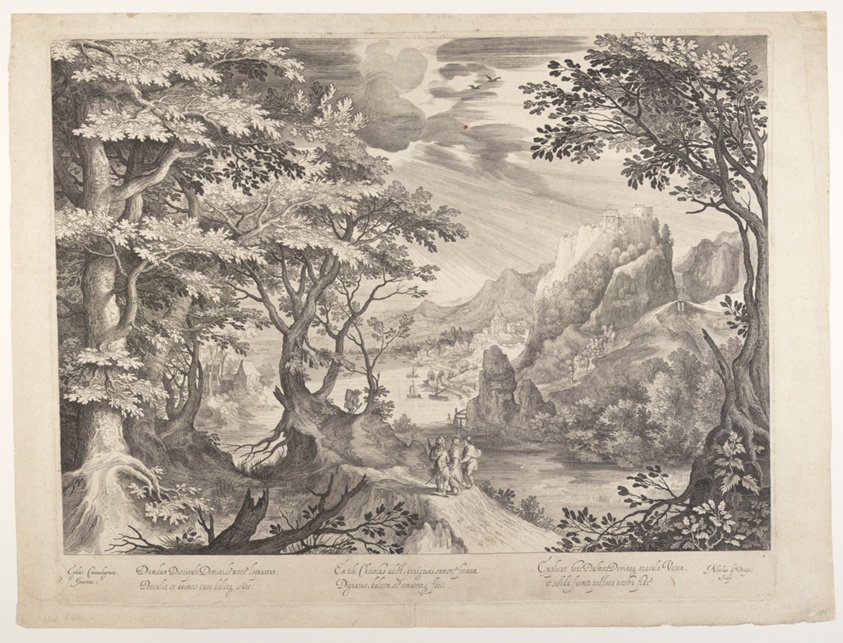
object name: Print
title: The Disciples on the Way to Emmaus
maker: Nicolaes de Bruyn (Flemish, 1571–1656); after Gillis van Conixloo (Flemish, 1544–1606)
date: c. 1601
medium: Engraving on ivory laid paper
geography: Flanders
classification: engraving; paper; print; prints and drawing